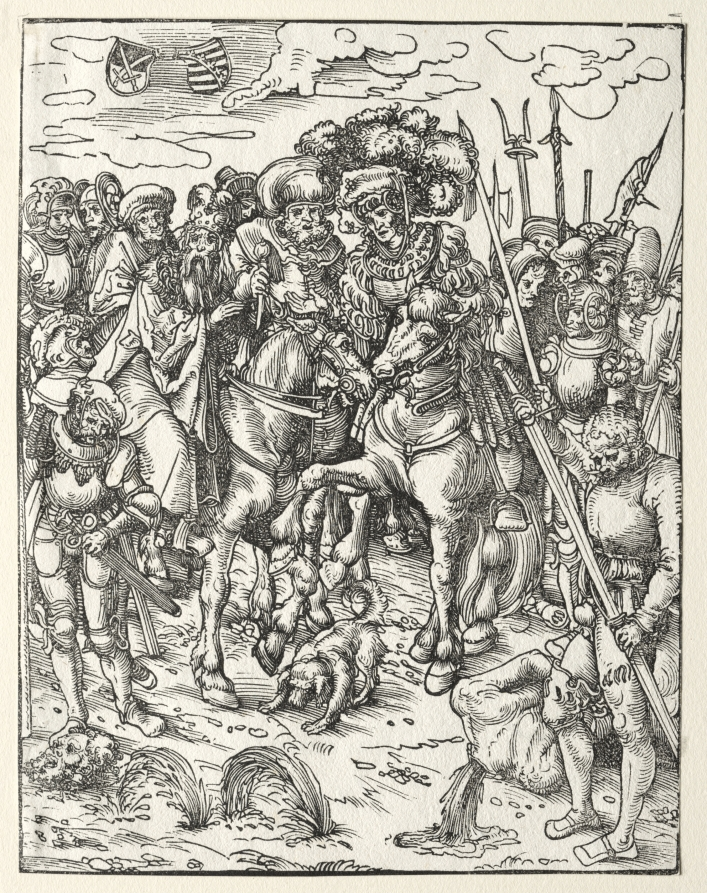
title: Martyrdom of St. Matthew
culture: Germany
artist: Lucas Cranach (German, 1472–1553)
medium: woodcut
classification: Print